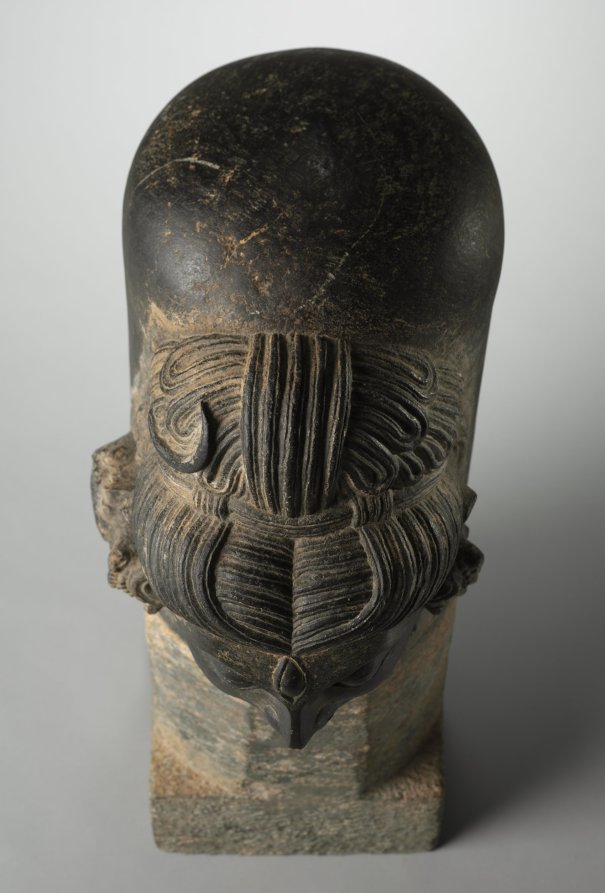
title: One-Faced Linga (Ekamukhalinga)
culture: Eastern India, Bihar, Medieval period, Pala dynasty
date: 600s–700s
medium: chloritic schist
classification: Sculpture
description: The innermost sanctum of a Hindu temple dedicated to Shiva is called a womb chamber in which a stylized phallus called a linga is installed. Together, the chamber and linga represent the potentiality of creation. Artists depict the first stage of creation by a face emerging from the phallus, which embodies one aspect of Shiva. This face is of a powerful yogi, with long matted locks adorned with a crescent moon. He has a penetrating gaze with all three of his eyes. This icon would have been accessed primarily by Brahmin priests who would perform rituals honoring Shiva as the ultimate creator of the world.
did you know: Some lingas have four faces that indicate a more advanced stage of creation.